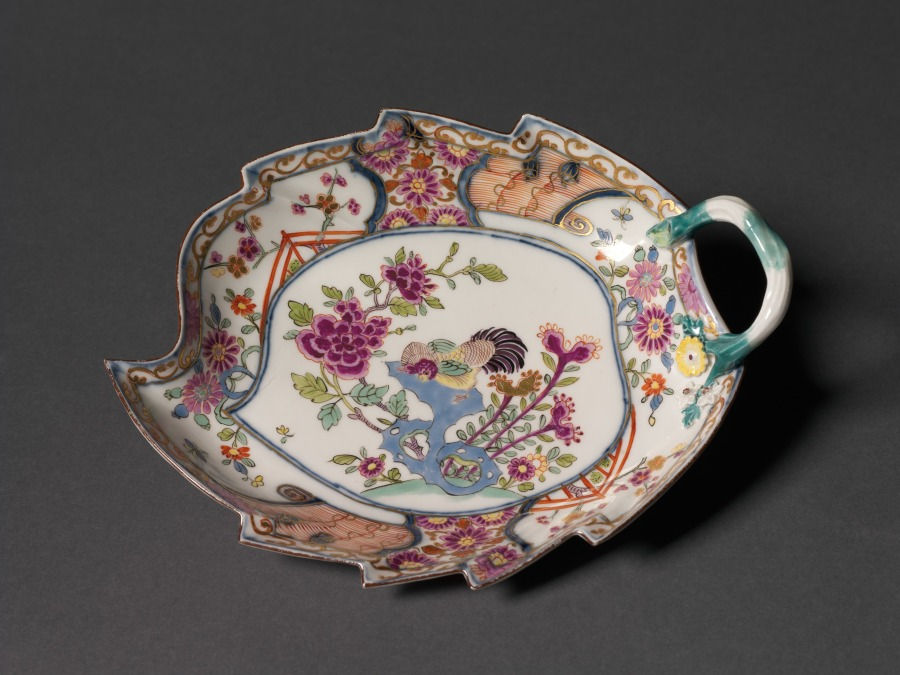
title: Leaf Dish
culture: Germany, Meissen, 18th century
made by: Meissen Porcelain Factory (German, est. c. 1710)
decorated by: possibly by Johann David Kretschmar (German)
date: c. 1735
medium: porcelain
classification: Ceramic